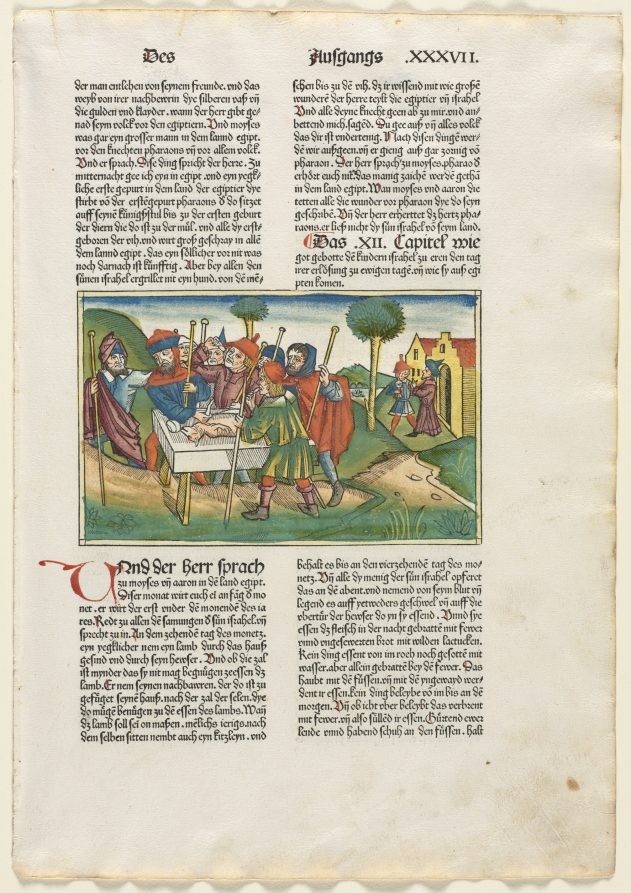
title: Offering of the Paschal Lamb from the German Bible published by Anton Koberger, Nürnberg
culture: Germany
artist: Anonymous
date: 1483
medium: woodcut with hand coloring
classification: Print